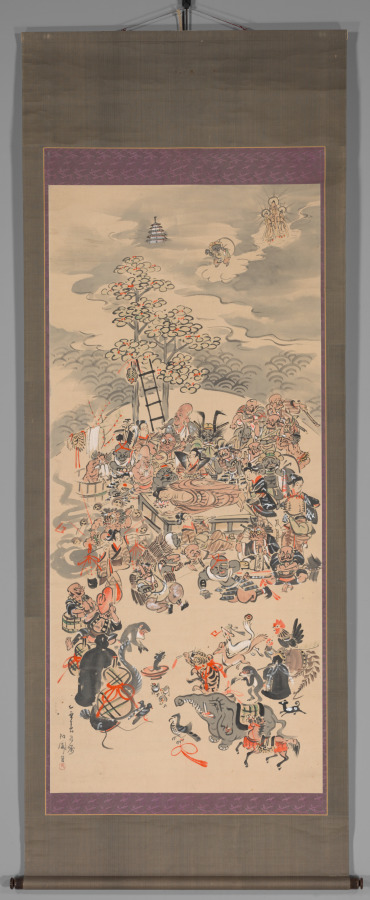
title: Ōtsu-e Nirvana of the Buddha (Ōtsu-e Butsu Nehanzu)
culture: Japan, Meiji period (1868–1912)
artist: Hakuen (Japanese, active 1850–1870)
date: 1800s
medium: hanging scroll, ink and color on paper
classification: Painting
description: The painting parodies the traditional representation of this subject. The death of Buddha is actually the moment he achieves nirvana and escapes the endless cycle of death and rebirth. Hakuen transformed this serious moment (see The Death of the Buddha [1916.1141]) into a lively parody with otsu-e subjects. Mourners surround the Buddha. An oni, who pretends to be a priest, holds his gong in the air as he beats his drums and chants prayers. The wisteria maiden appears at the left, bringing water to the mourners. Behind her is an oni in the guise of a thunder god beating his drums. The animals along the foreground represent other otsu-e characters and models. The painting would have amused 19th-century viewers familiar with the usual Buddhist imagery.